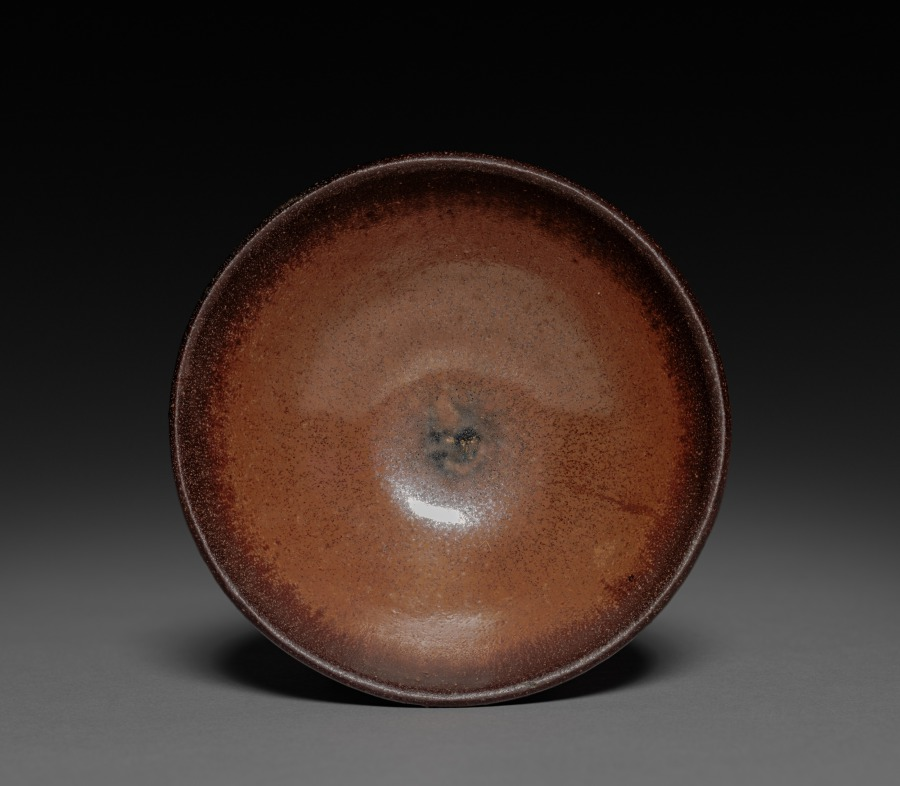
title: Tea Bowl: Jian ware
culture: China, Fujian province, Song dynasty (960-1279)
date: 960– 1279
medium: stoneware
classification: Ceramic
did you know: Jian ware was very popular with the tea cultures in China and Japan.